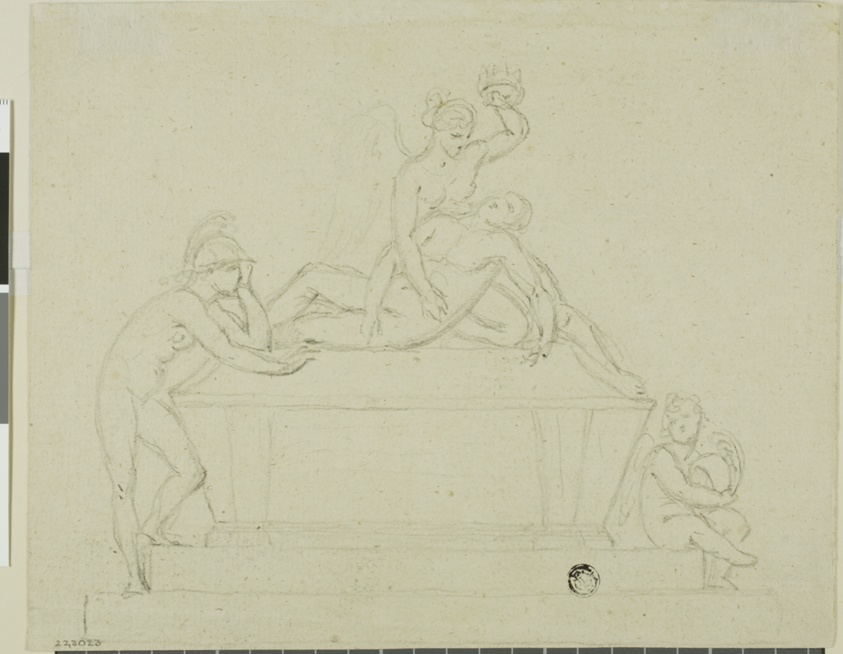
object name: Drawing and Watercolor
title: Project for a Tomb, Three Figures and an Angel (recto); Project for a Tomb: Three Figures and an Angel (verso)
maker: Possibly John Bacon, the elder (English, 1740-1799); or possibly John Michael Rysbrack (Flemish, 1693-1770)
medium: Black chalk (recot and verso) on cream laid paper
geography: England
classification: chalk; drawings (visual works); prints and drawing